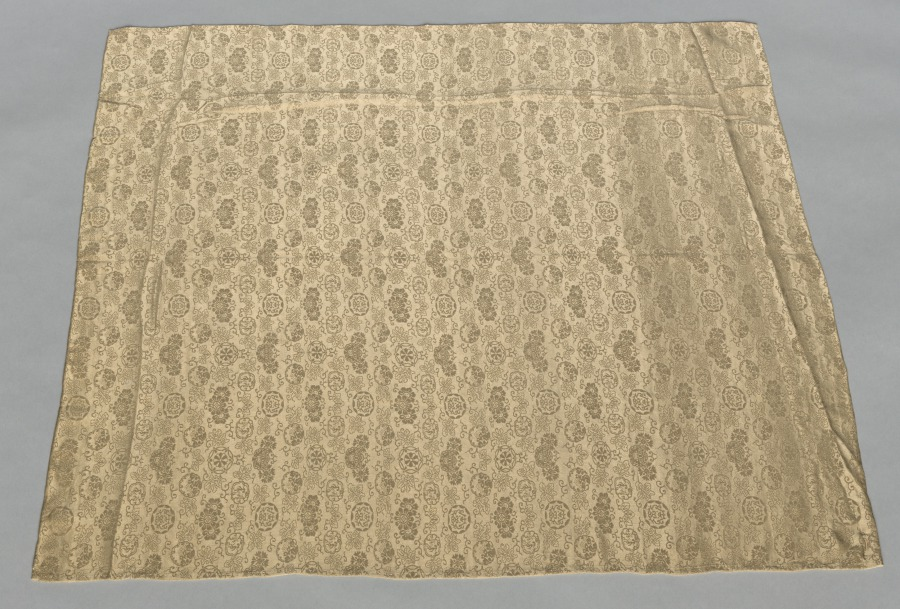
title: Fragment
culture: China, 19th century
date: 1800s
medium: silk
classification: Textile